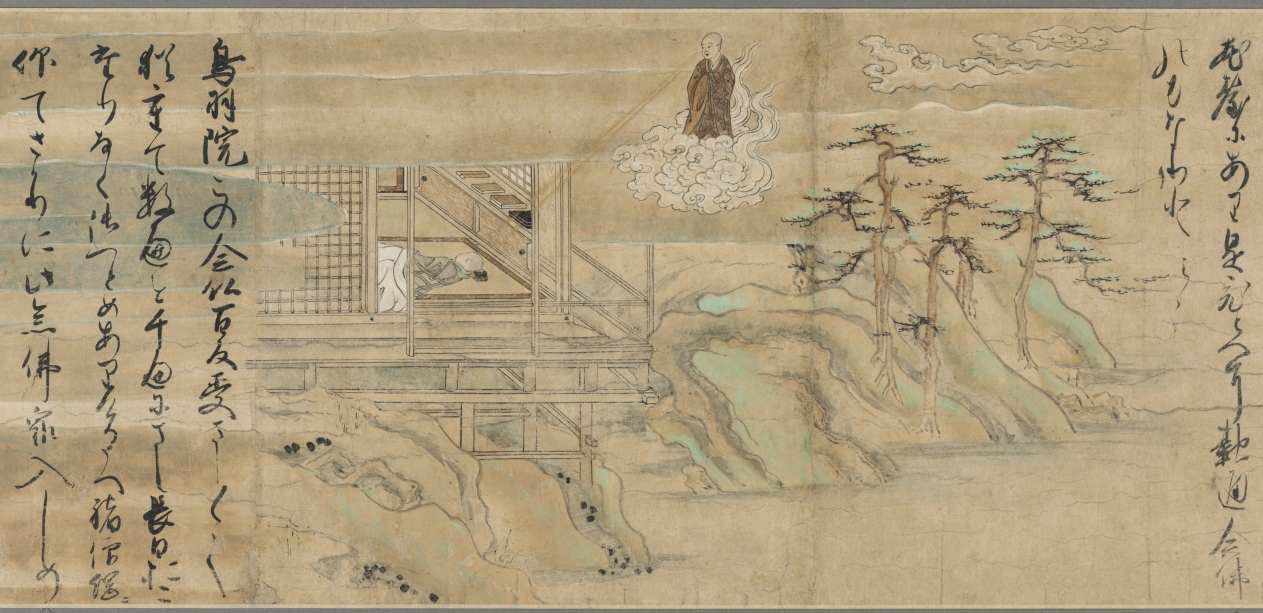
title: The Illustrated Miraculous Origins of the Yūzū Nenbutsu School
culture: Japan, Kamakura period (1185–1333)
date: early 1300s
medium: Handscroll; ink, color, and gold on paper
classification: Painting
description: This painting is the second of a set of two illustrated handscrolls. The first scroll depicts the biography of the Japanese Buddhist monk Ryōnin. This scroll begins with scenes of Ryōnin’s death and relates episodes illustrating the efficacy of following his teachings. Ryōnin asserted the total interconnectedness of all things and the spiritual benefit of chanting the name of the Buddha Amida for one another.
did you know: The other scroll from this two-scroll set belongs to the Art Institute of Chicago.